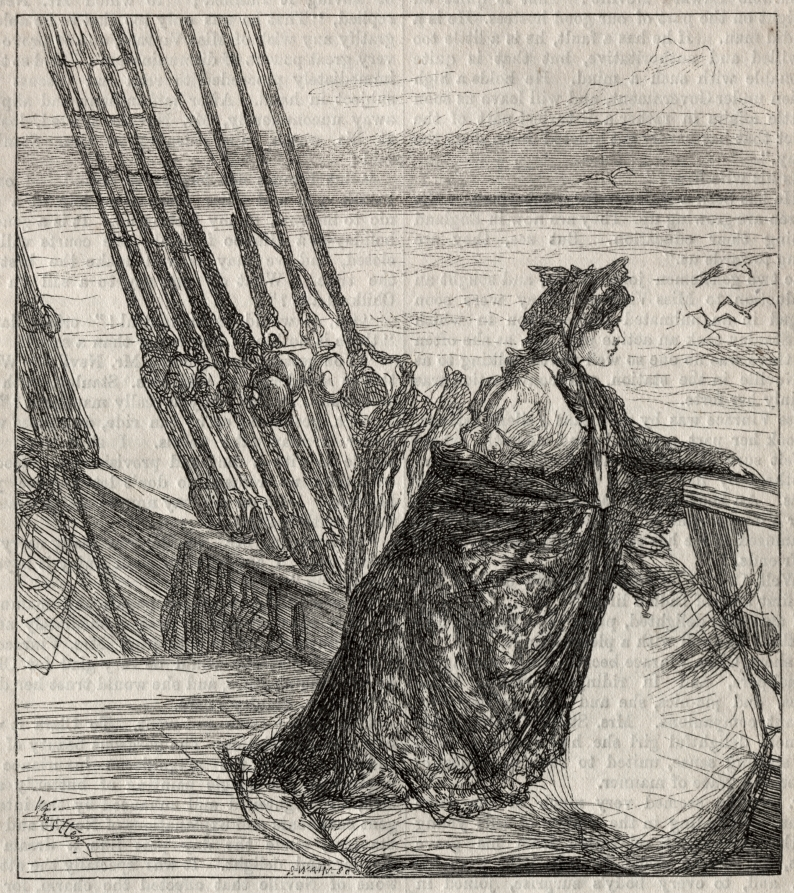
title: The Major's Daughter: Clara Vinrace's Farewell to her Father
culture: America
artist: James McNeill Whistler (American, 1834–1903)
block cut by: Joseph Swain (British, 1820–1909)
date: 1862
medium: wood engraving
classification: Print